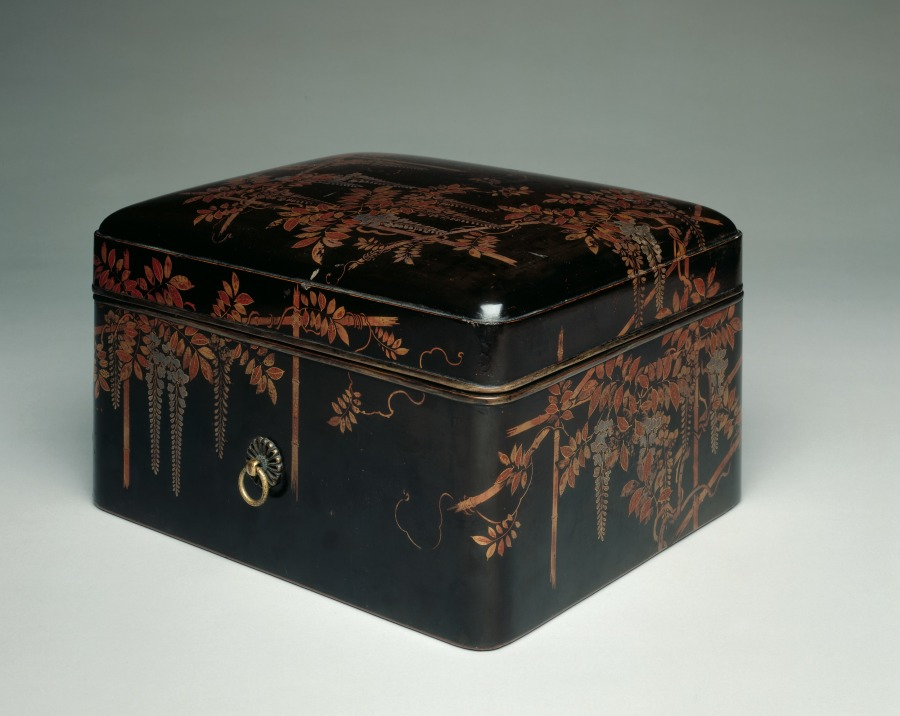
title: Cosmetic Box with Lid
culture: Japan, Momoyama period (1573–1615)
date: 1573–1615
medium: wood with lacquer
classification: Lacquer